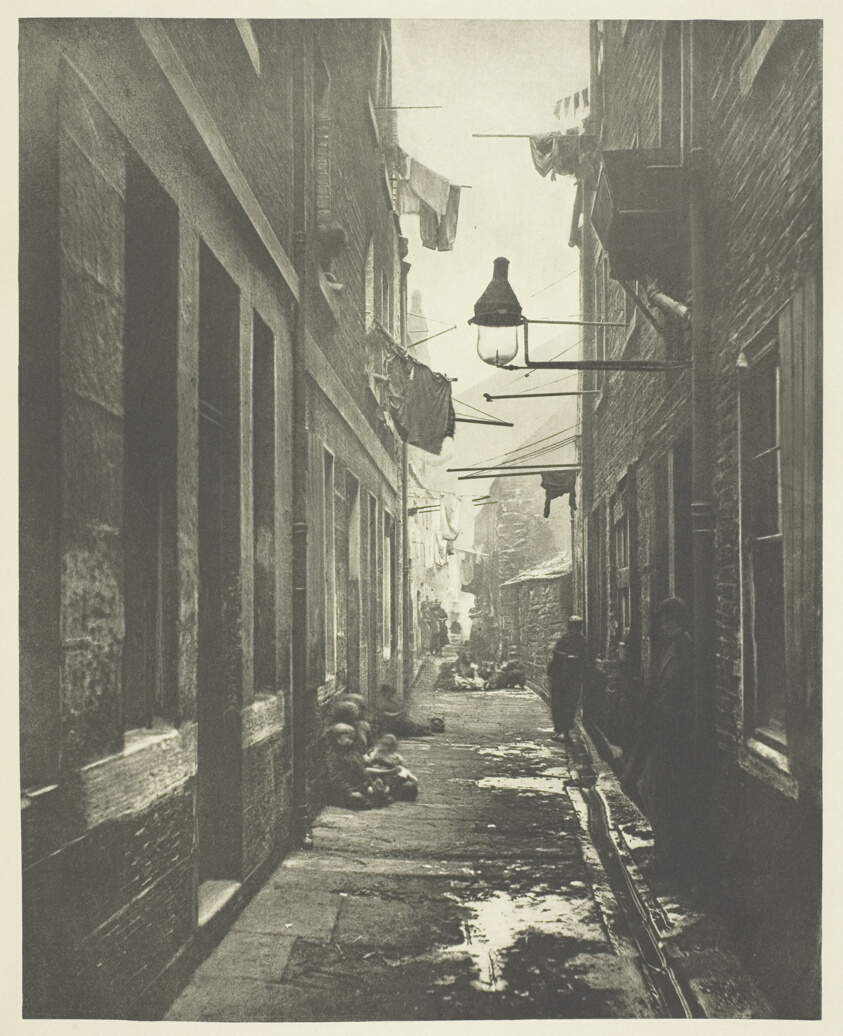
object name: Photograph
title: Close No. 80 High Street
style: 19th century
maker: Thomas Annan (Scottish, 1829–1887)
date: 1868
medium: Photogravure, plate 11 from the book "The Old Closes & Streets of Glasgow" (1900)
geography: Scotland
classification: photograph; photography